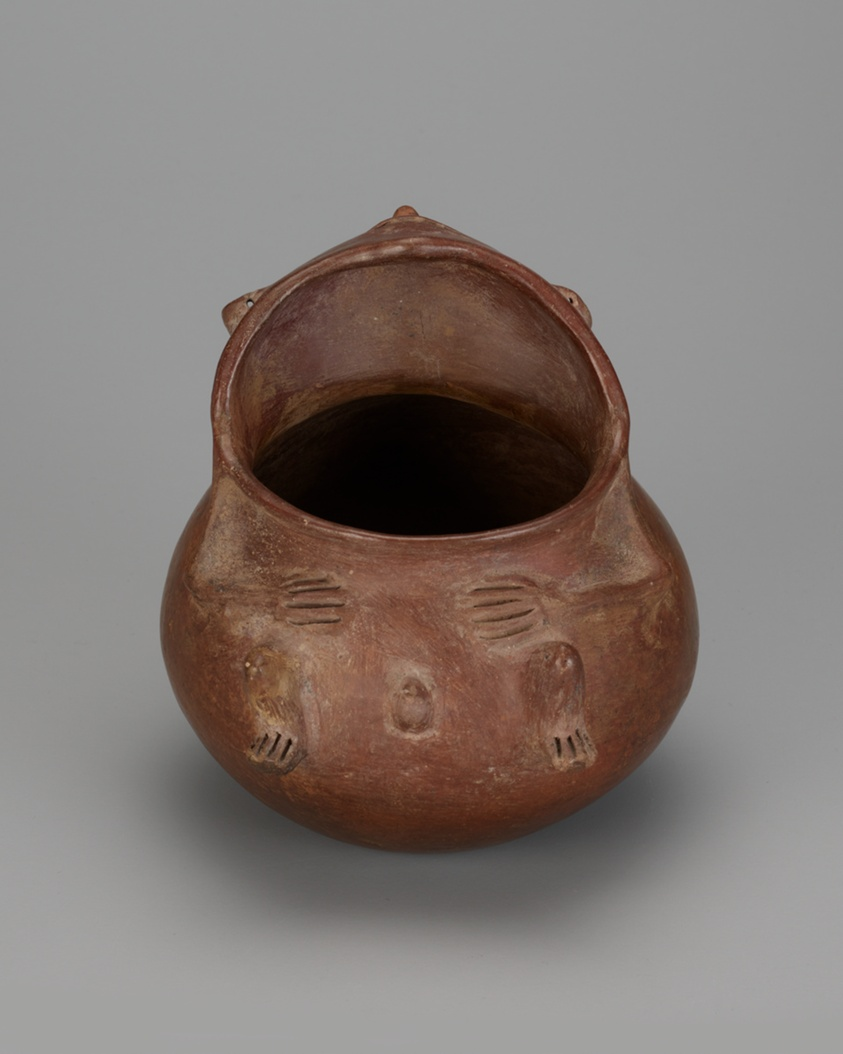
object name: Vessel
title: Vessel of a Male Figure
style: casas grandes, americas, Arts of the Americas, native american, native north american, southwest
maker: Ceramist unknown (Casas Grandes); New Mexico, United States, or Chihuahua, Mexico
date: 1280–1450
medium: Ceramic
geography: New Mexico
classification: vessel; art of the americas; ceramics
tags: figure, human figures